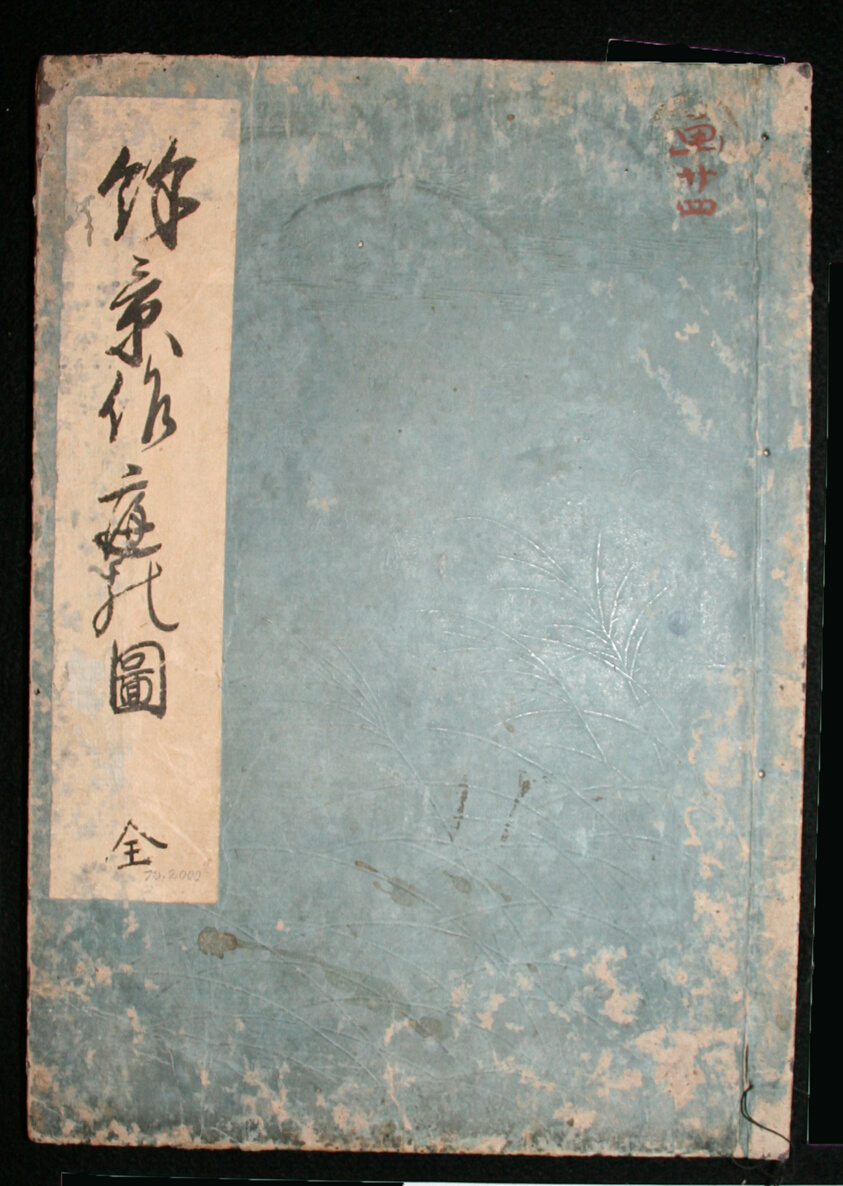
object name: Book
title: Yokei Tsukuri Niwa no Zu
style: edo (japanese period), Japanism, East Asian, asian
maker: Hishikawa Moronobu (Japanese, died 1694)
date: 1695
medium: Woodblock printed book, single volume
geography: Japan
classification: book; asian art